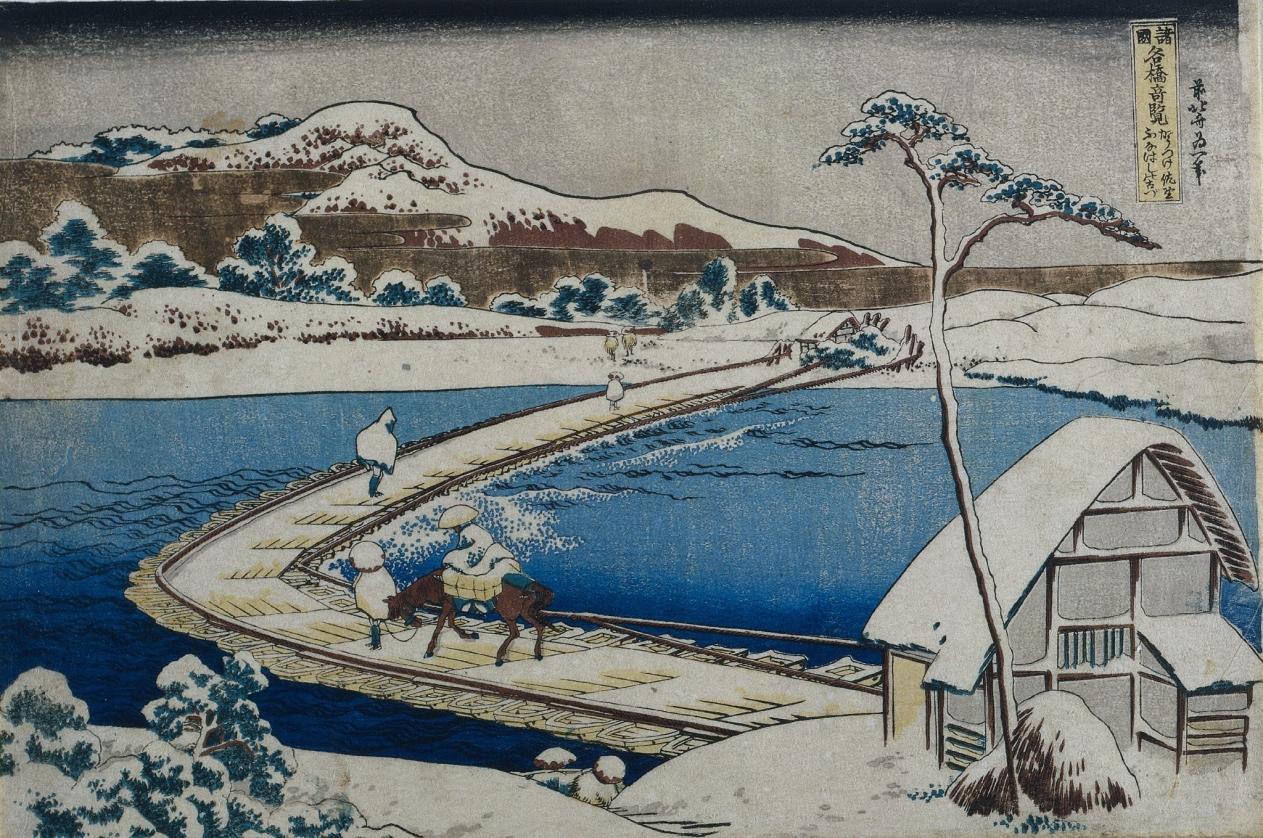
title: An Ancient Picture of the Boat Bridge at Sano in Kozuke Province from the series Curious Views of Famous Bridges in the Provinces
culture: Japan, Edo period (1615–1868)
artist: Katsushika Hokusai (Japanese, 1760–1849)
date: early 1830s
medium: color woodblock print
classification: Print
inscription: Signature: Zen Hokusai Iitsu hitsu Censorship Seal: kiwame